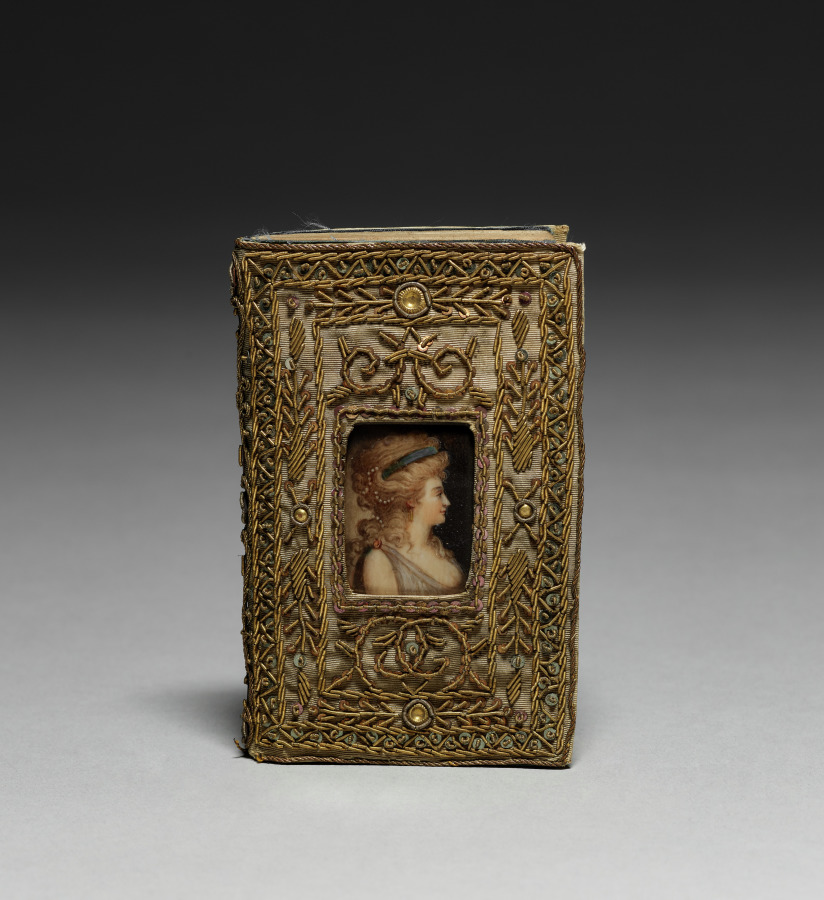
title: Book Bound in Silk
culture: France, 19th century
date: 1804–5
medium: silk, metal thread, reverse painted glass, paper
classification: Miscellaneous